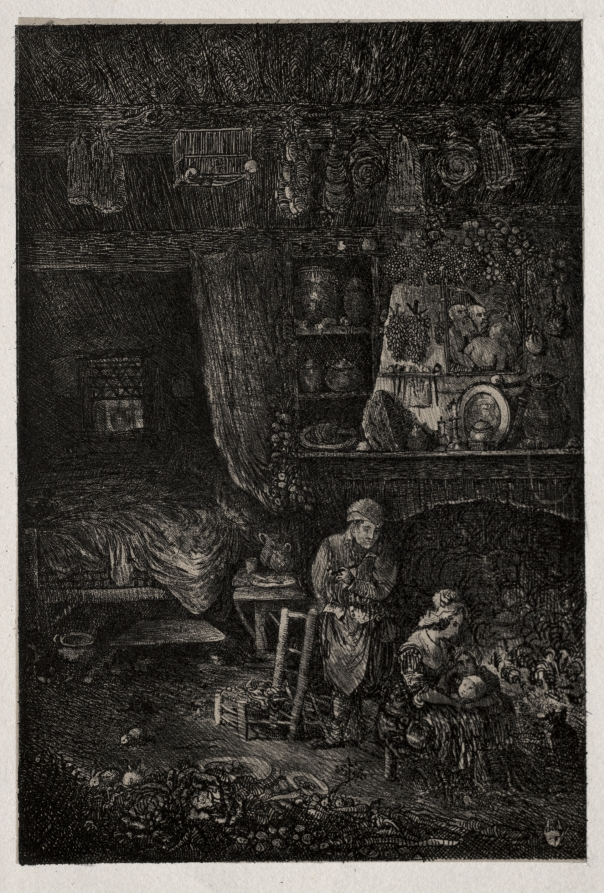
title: Flemish Interior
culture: France, 19th century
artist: Rodolphe Bresdin (French, 1822–1885)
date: 1856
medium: lithograph and roulette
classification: Print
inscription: lower center, in stone: INTÉRIEUR FLAMAND